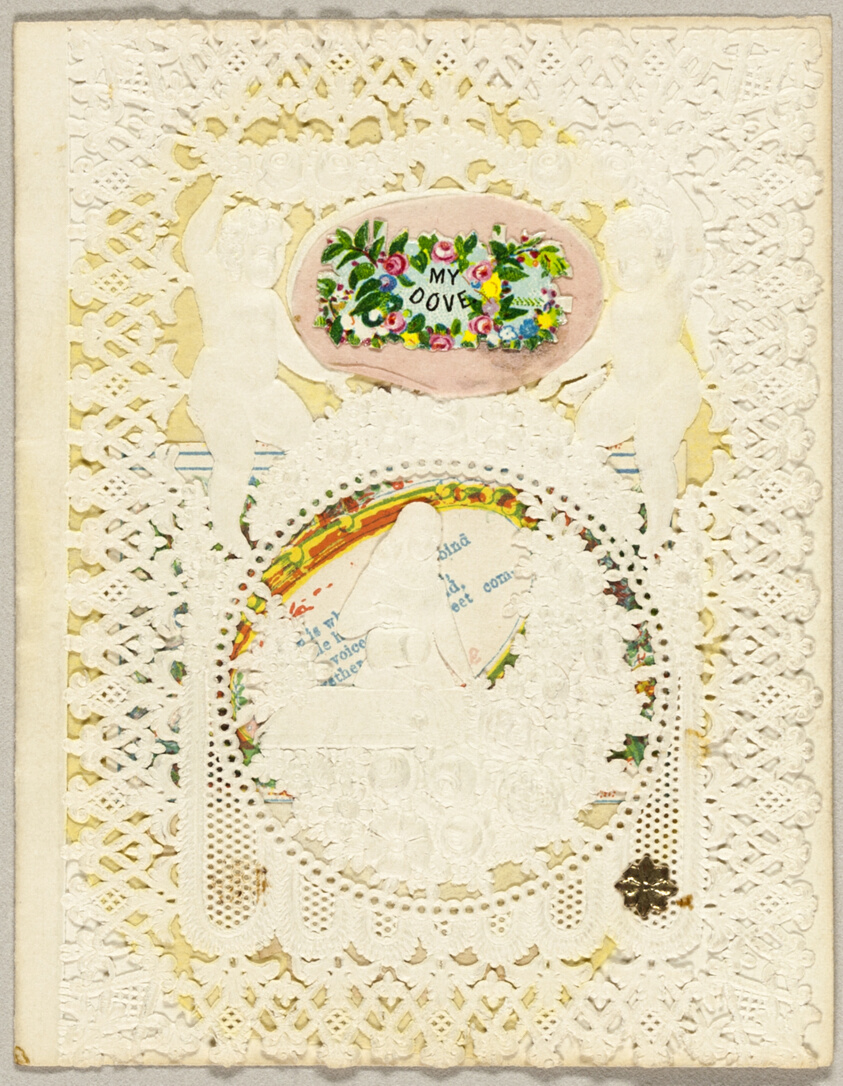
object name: Drawing and Watercolor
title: My Dove (Valentine)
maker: David Mossman (English, 1825-1901)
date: 1850/59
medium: Collaged elements on cut and embossed (designed) ivory wove paper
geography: England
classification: collage; valentine; prints and drawing; paper